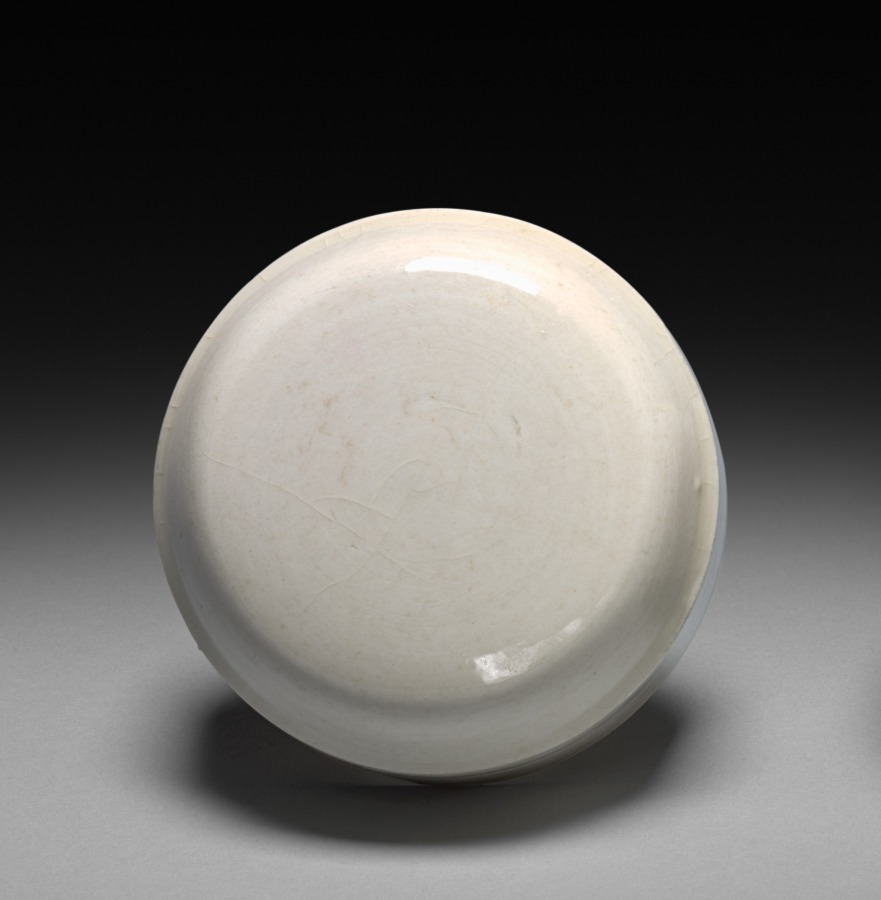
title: Covered Box (lid)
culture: China, Hebei province, Quyang, Northern Song dynasty (960–1127)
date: 1000s–1100s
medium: white porcelain, Ding ware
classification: Ceramic